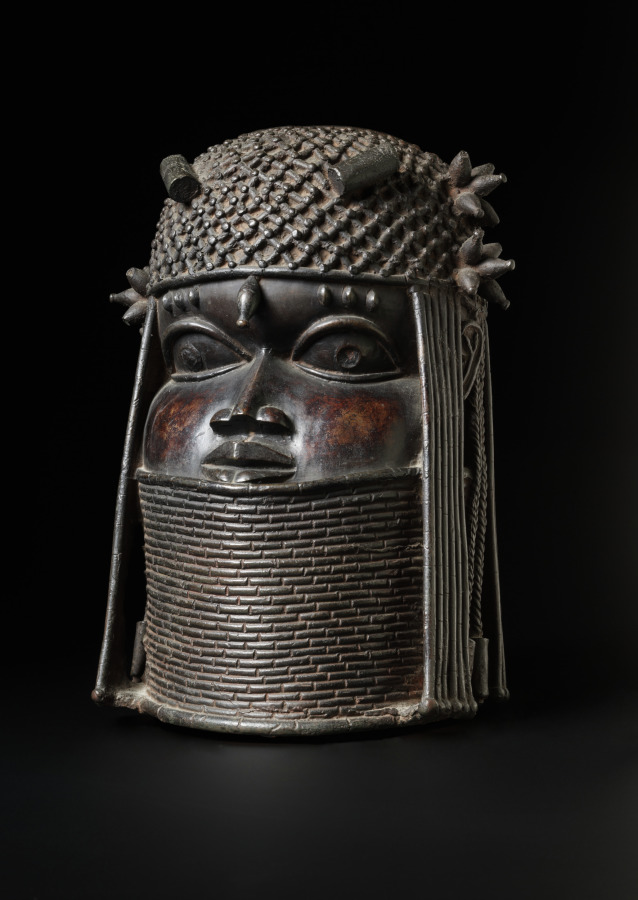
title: Ancestral Commemorative Head (uhunmwun-elao)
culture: Nigeria, Benin Kingdom, Ẹdo peoples, members of the Igun Eronmwon (royal brasscasters) guild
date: possibly mid-1500s or early 1600s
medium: Copper alloy and iron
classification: Sculpture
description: Brass heads are among many objects a new Ọba commissions when dedicating a shrine to their predecessor. This head of an Ọba wears layered necklaces of royal coral beads. Tubular beads adorn both the netted cap and slender braids alongside his temples. While representing an individual, his facial features and calm expression are idealized. The thickly cast head once supported a tusk. Immune to corrosion, brass symbolizes royal permanence. A personal religious object, this head sat on an ancestral altar in the Ọba’s palace. Like many works taken from Benin altars, this contrasts with its present-day public display in an American museum.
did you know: The obas (kings) of the Benin Kingdom still wear coral headpieces and jewelry like this sculpted head depicts.